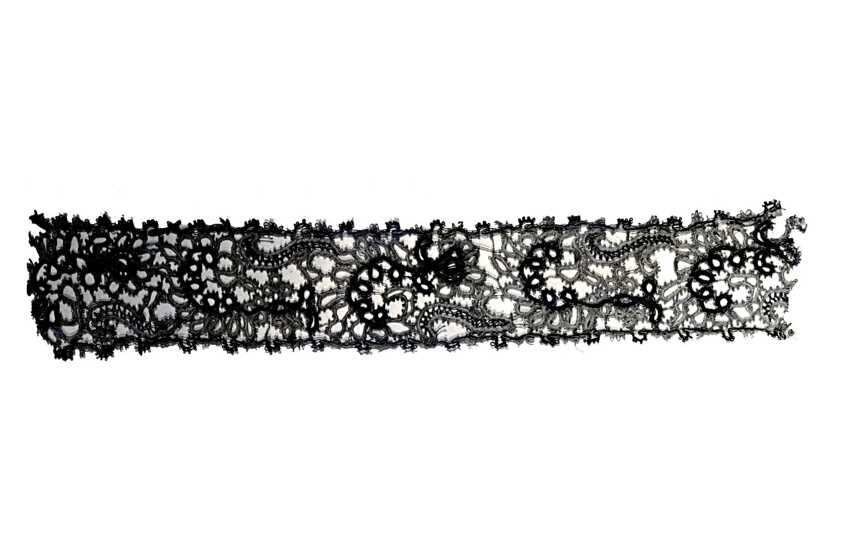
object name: Textile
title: Braid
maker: England or France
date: 1650/75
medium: Silk and silk-wrapped linen cords, bobbin straight lace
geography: England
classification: textile; lace - bobbin